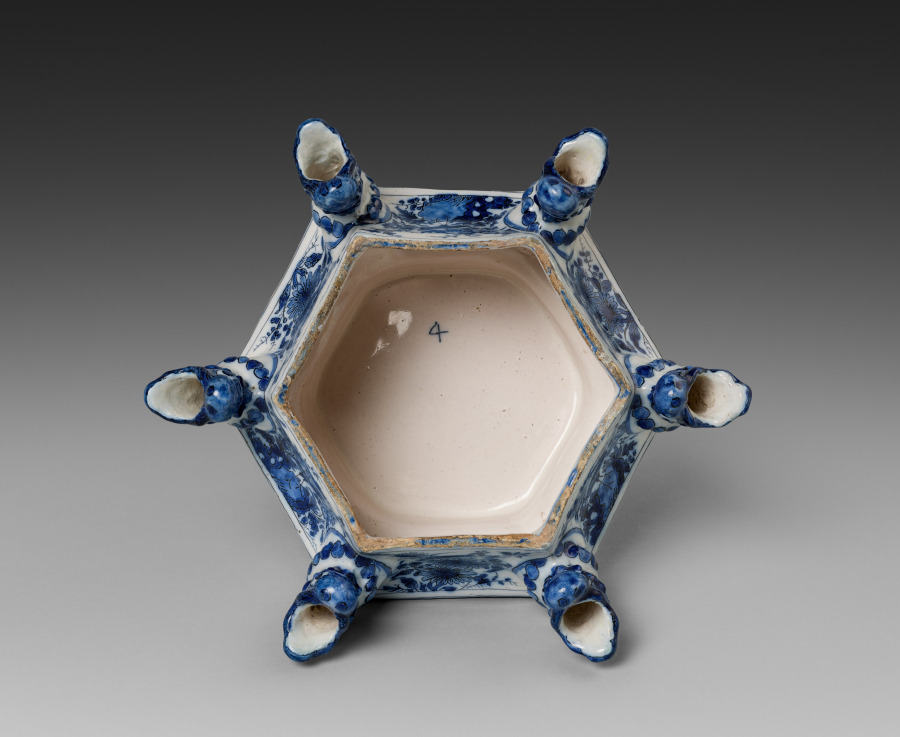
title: Second Tier for a Flower Pyramid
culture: Netherlands, Holland, Delft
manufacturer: Adrianus Kocx (Dutch, active 1686–1701)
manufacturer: De Grieksche A (The Greek A) Factory (Netherlands, 1658–1811)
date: c. 1690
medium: Tin-glazed earthenware, painted in blue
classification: Ceramic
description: Allegorical figures representing Faith, Hope, and Love decorate the base of this pyramid, on which rest six tiers with spouts where flowers can be placed. Flower pyramids are among the most complex and luxurious types of ceramics produced in Delft in the late 1600s. This example was made in the Greek A Factory, owned by Adrianus Kocx. During his tenure, the factory became the most prestigious of Delft potteries and received commissions from Queen Mary II, who ruled over England, Scotland, and Ireland together with her husband, William III. She contributed to the international spread of the fashion for Delft ceramics.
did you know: The iconic blue-and-white ceramics from Delft originated as an attempt to copy Chinese porcelain.